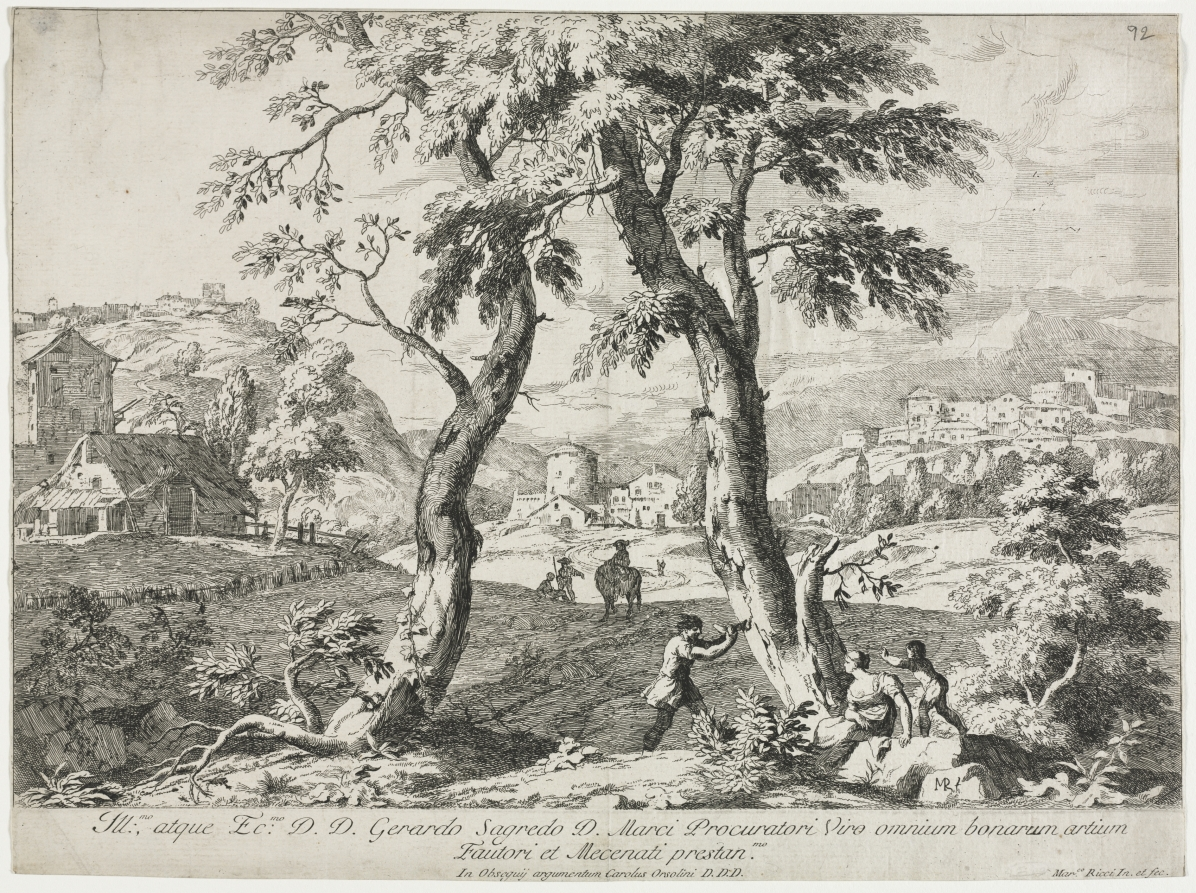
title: View of a Village with Figures in the Foreground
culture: Italy, 18th century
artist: Marco Ricci (Italian, 1676–1729)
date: 1723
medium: etching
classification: Print